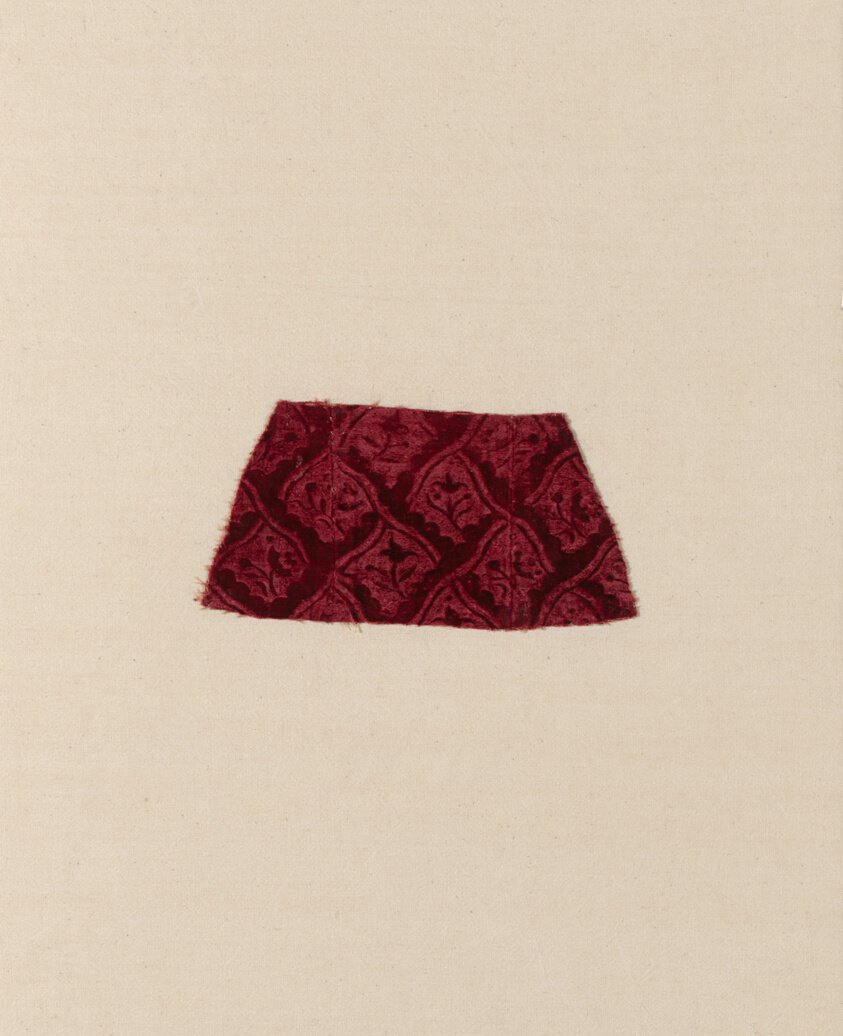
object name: Textile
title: Fragment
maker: Italy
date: 17th century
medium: Stamped cut solid velvet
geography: Italy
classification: textile; weaving - velvet